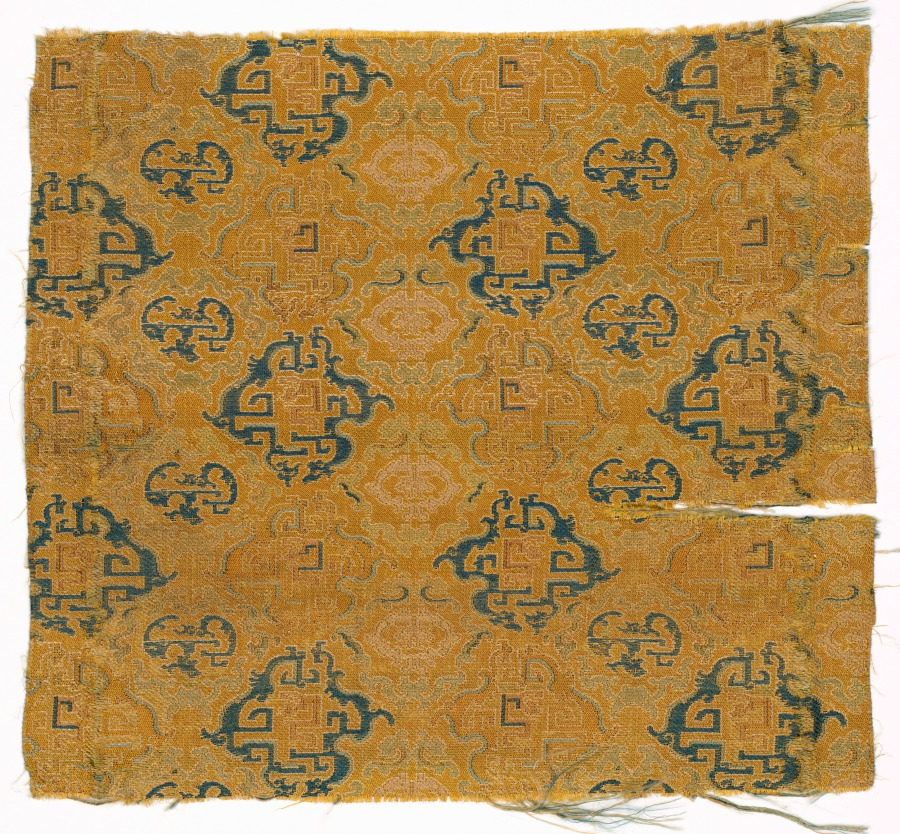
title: Fragment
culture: China, Qing dynasty (1644-1911)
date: 1800–1820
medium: Silk, diaper weave; twill ground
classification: Textile